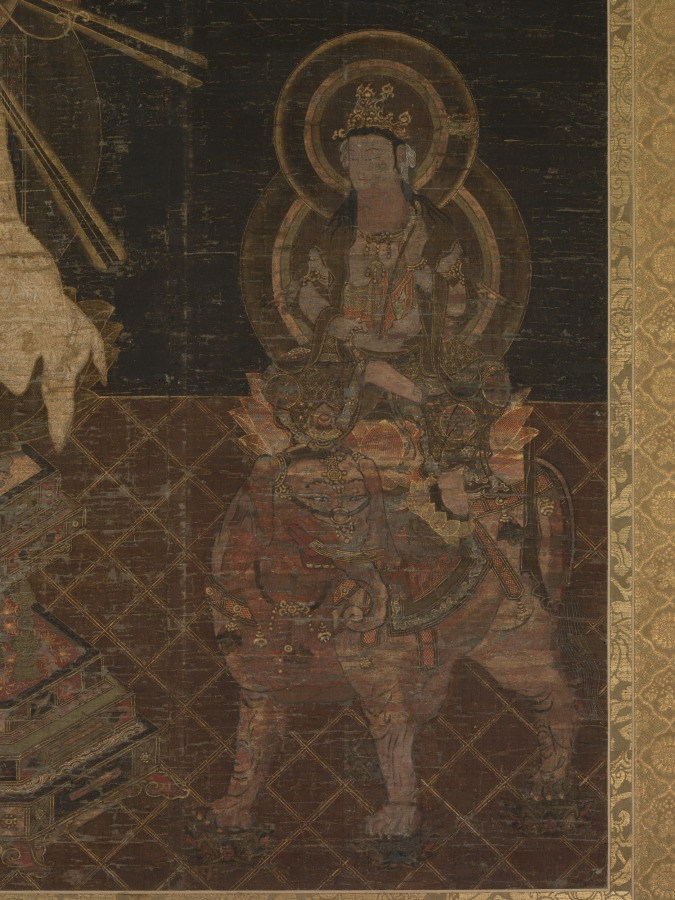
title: Shakyamuni Triad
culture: Japan, Kamakura period (1185–1333)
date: c. 1200–1333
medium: hanging scroll; ink, color, gold and cut-gold on silk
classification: Painting